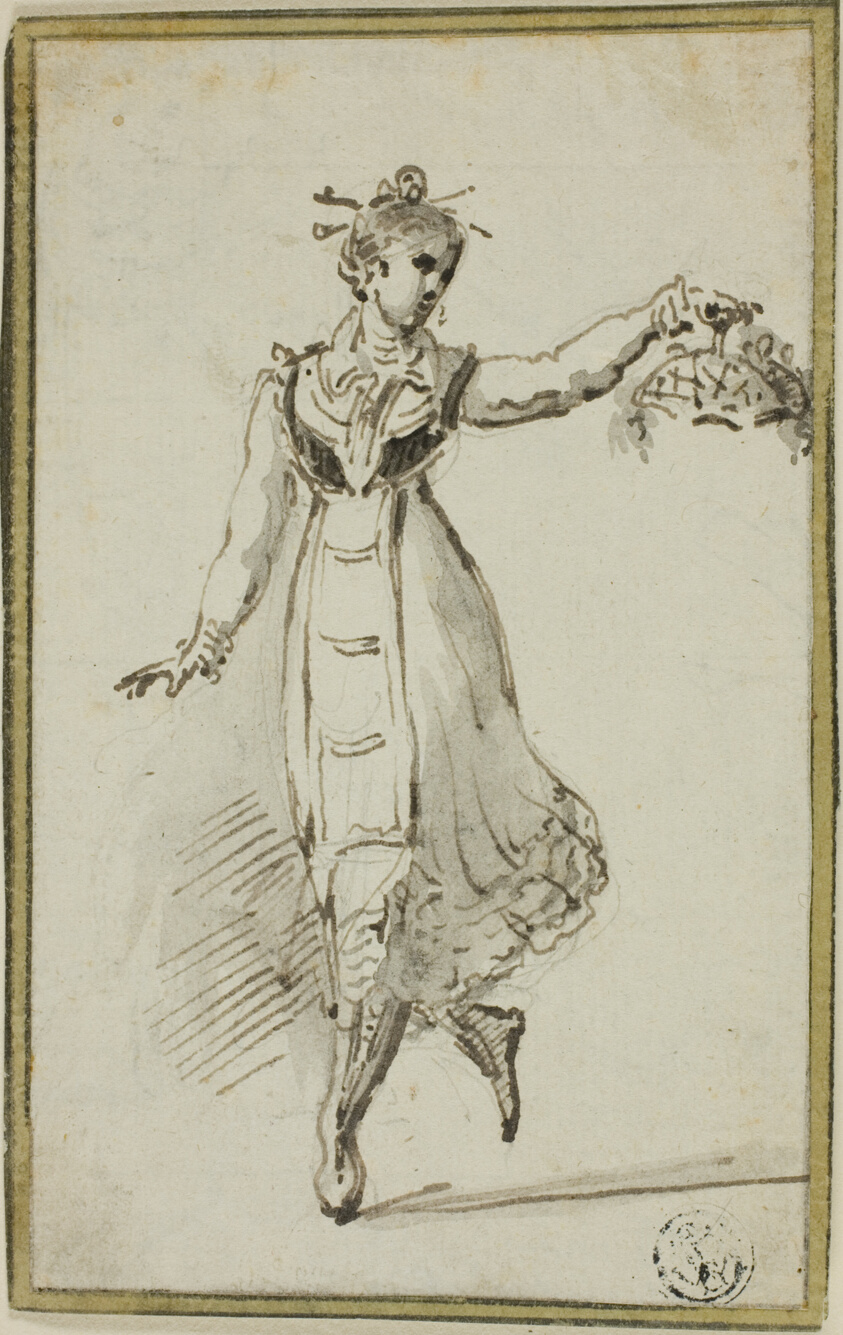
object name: Drawing and Watercolor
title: Young Woman Dancing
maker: Unknown Artist; Swiss, 1800-1899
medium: Pen and brown ink, with brush and gray wash, over graphite, on ivory laid paper, laid down on pale green laid paper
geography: Switzerland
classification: pen and ink drawings; drawings (visual works); prints and drawing